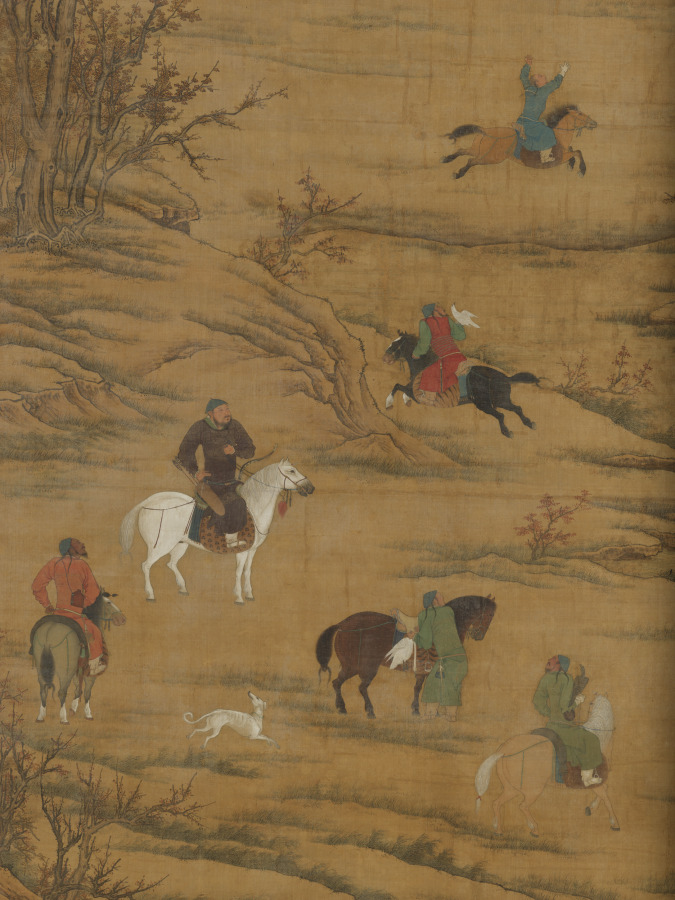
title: Hunting on Horses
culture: China, Ming dynasty (1368-1644) - Qing dynasty (1644-1911)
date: c. 1600s–1700s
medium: Hanging scroll; ink and color on silk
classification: Painting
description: This large-scale hanging scroll depicts a party hunting for waterfowl along a riverbank in the springtime. The leader is distinguished from the other five mounted hunters by his purple robe with golden dragon patterns and his white horse with a red tassel. He and his horse maintain still, dignified postures as a small white falcon captures one of the wild geese. Equestrian pursuits and hunting were particularly popular among the Khitan (also spelled “Qidan”) and Jurchen, ethnic groups who lived along China’s northeastern border. Their nomadic lifestyle intrigued the Chinese court and inspired Chinese artists to develop a painting genre showing them hunting.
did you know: This falconry scene includes one white hunting dog and four trained hunting birds.